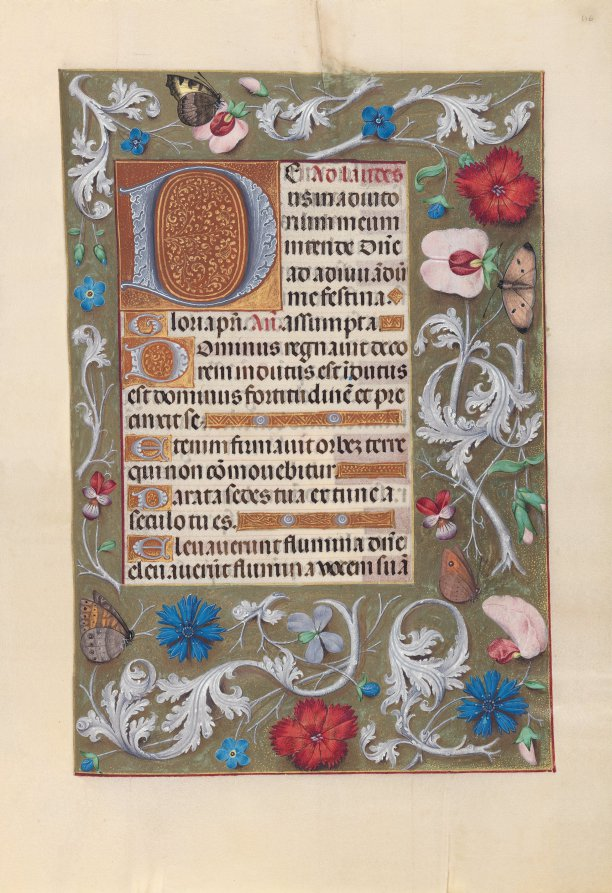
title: Hours of Queen Isabella the Catholic, Queen of Spain: Fol. 116r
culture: Flanders, Ghent and Bruges, late 15th century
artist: Master of the First Prayerbook of Maximillian (Flemish, c. 1444–1519)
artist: and Associates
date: c. 1500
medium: ink, tempera, and gold on vellum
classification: Bound Volume